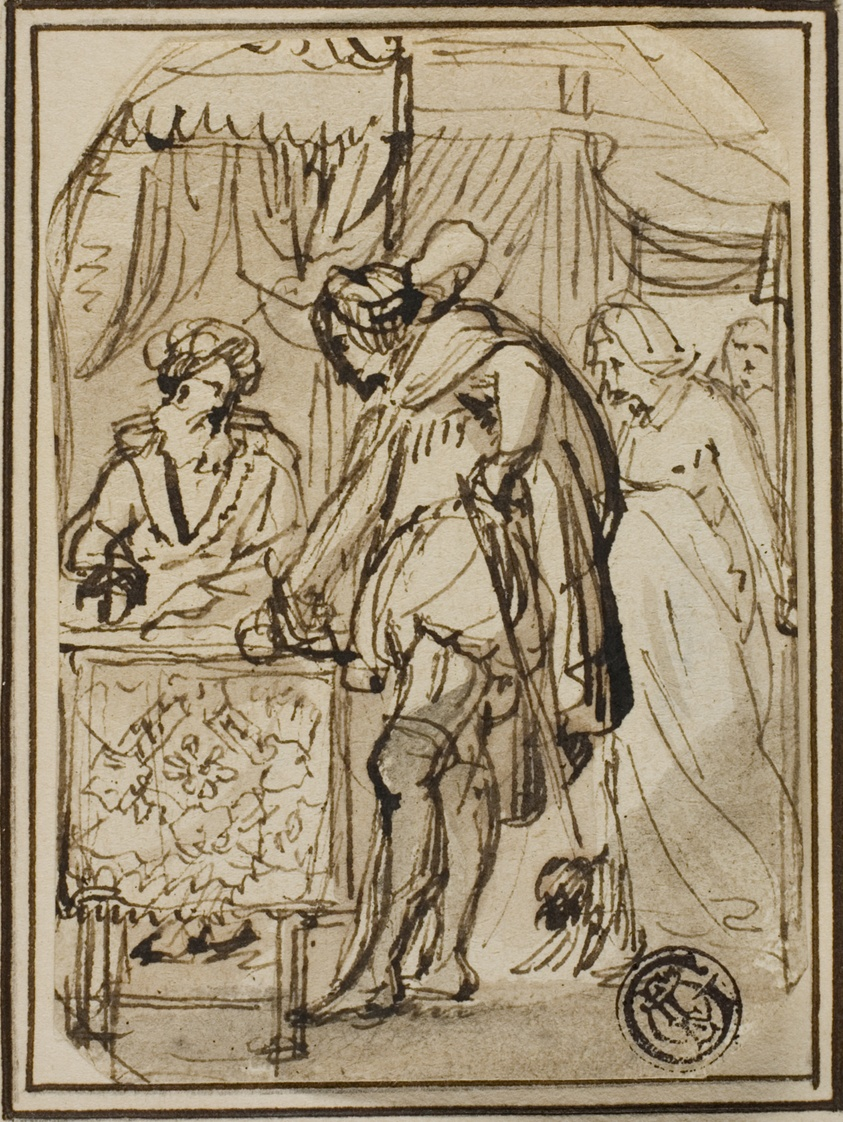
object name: Drawing and Watercolor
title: Young Man at Scribe's Table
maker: Attributed to Thomas Stothard; English, 1755-1834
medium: Pen and brown ink with brush and brown wash, on ivory laid paper, tipped onto cream laid paper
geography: England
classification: pen and ink drawings; drawings (visual works); prints and drawing